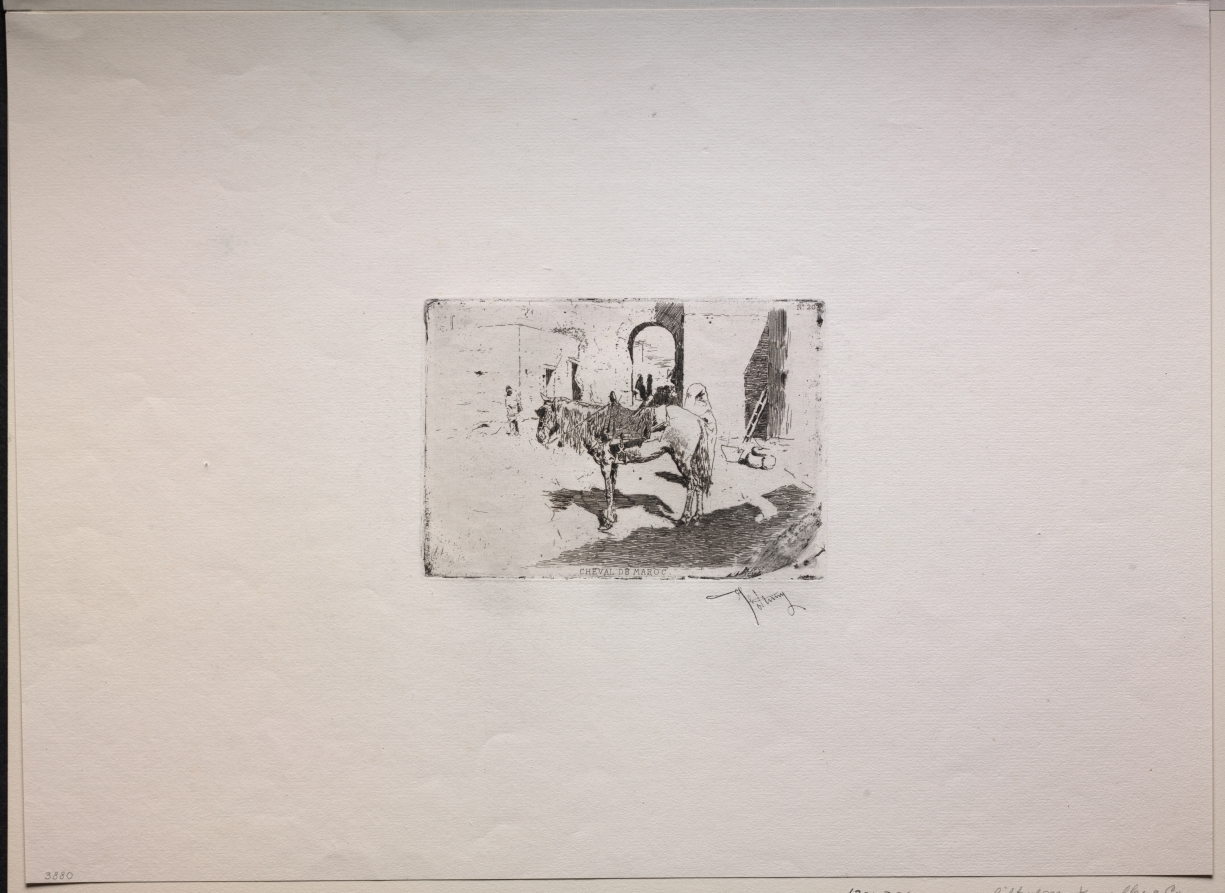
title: Moroccan Horse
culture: Spain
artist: Mariano Fortuny (Spanish, 1838–1874)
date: c. 1862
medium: etching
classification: Print